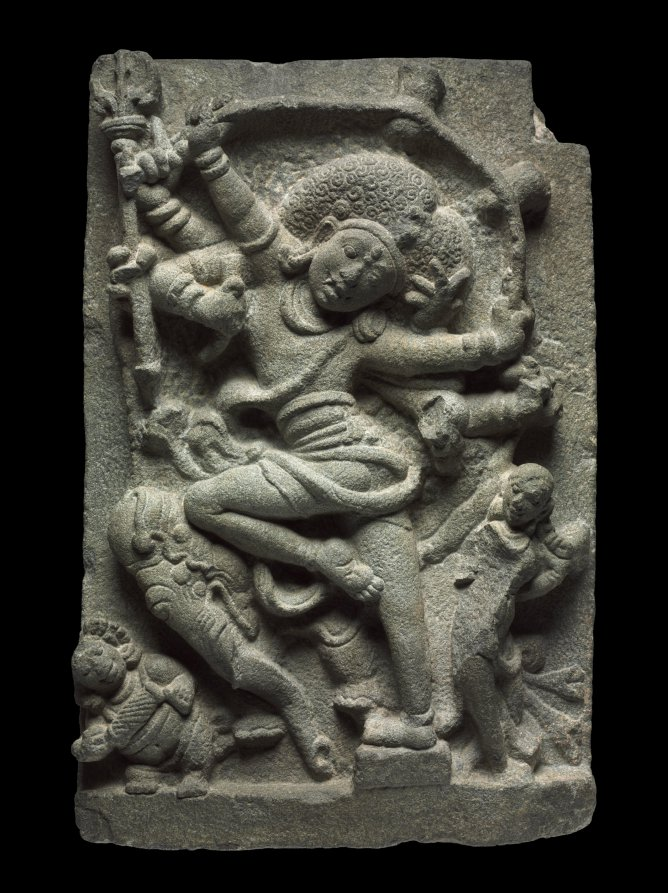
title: Shiva as Slayer of the Elephant Demon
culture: South India, Tamil Nadu, early Chola Period, 11th century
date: 1000s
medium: granite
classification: Sculpture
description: In an exuberant dance posture with eight arms, Shiva is shown here in his wrathful aspect, with disheveled hair, bulging eyes, and fangs. He has just successfully flayed the skin of an elephant demon and triumphantly stretches it out behind him, its two hind feet sticking up at the right corner of the panel. The elephant in rut, in its demonic form, was used as a metaphor for uncontrolled passions that Shiva helps to conquer in the mind of the devotee, so that the devotee can better focus his attentions on the god himself. In the lower left corner, a dwarfish member of Shiva's entourage beats the rhythm of the dance on his drum. His wife, the goddess Parvati, looks on with admiration.